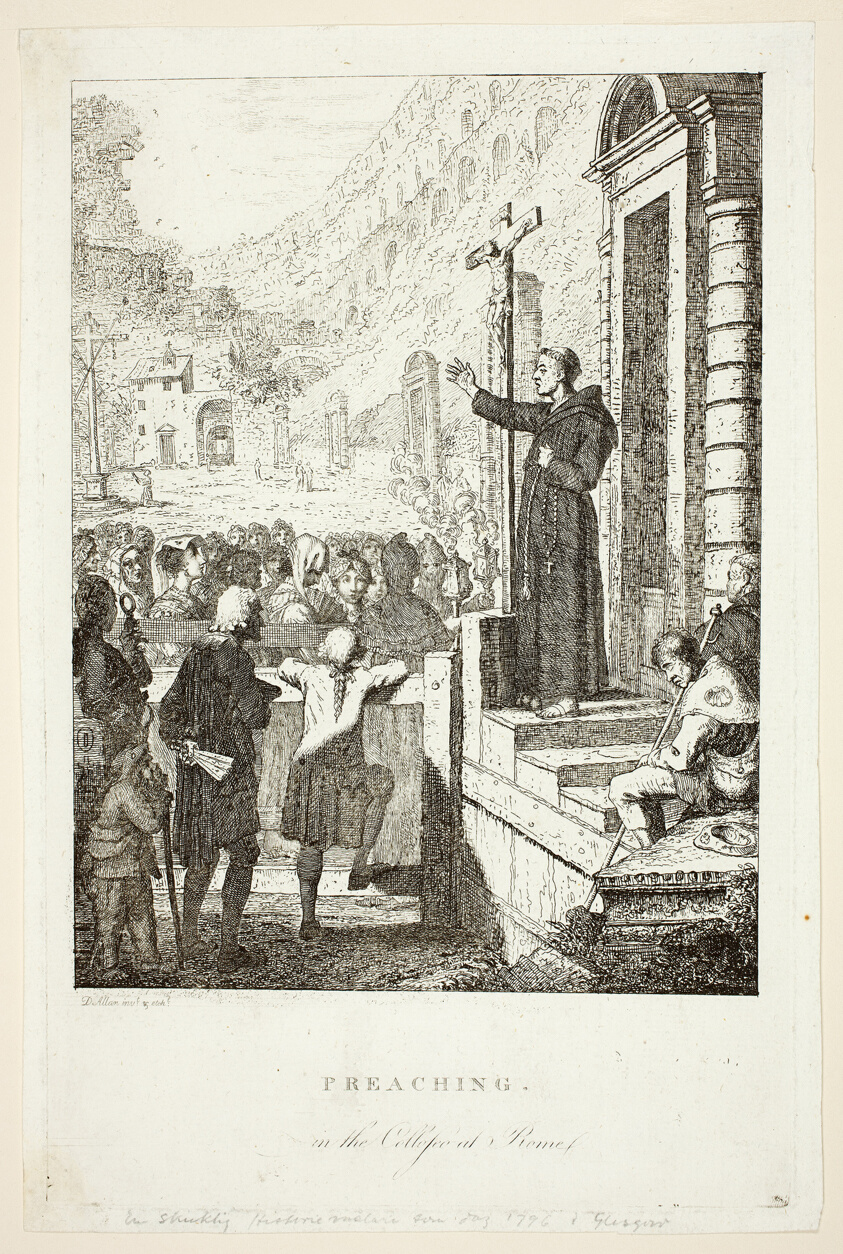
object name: Print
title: Preaching in the College at Rome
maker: David Allan (Scottish, 1744-1796)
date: 1773/75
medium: Etching on ivory laid paper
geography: Scotland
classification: etching; print; prints and drawing